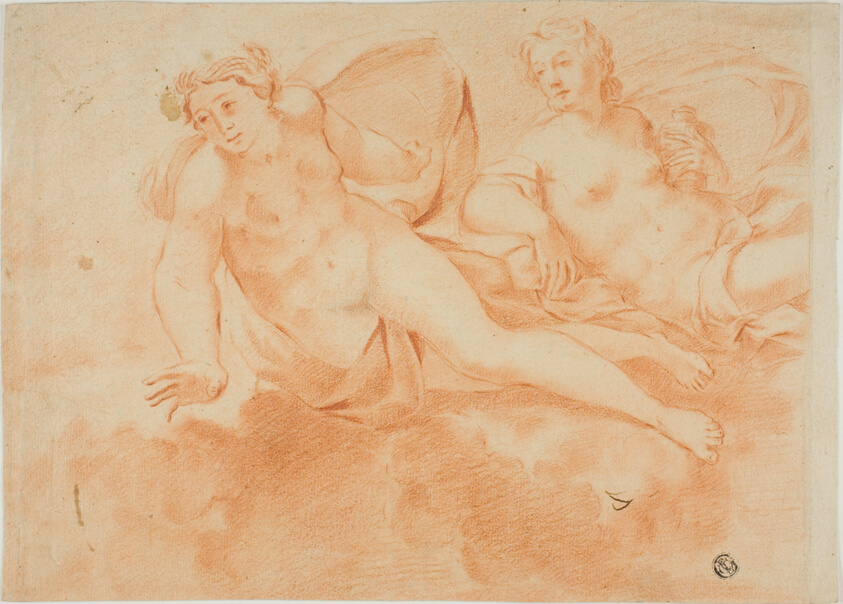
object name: Drawing and Watercolor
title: Two Cloud-Borne Nude Female Figures (recto); Fragment of Reclining Figure (verso)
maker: Attributed to Carlo Cignani; Italian, 1628-1719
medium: Red chalk, with traces of graphite (recto), and red chalk (verso), on ivory laid paper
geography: Italy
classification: drawings (visual works); prints and drawing